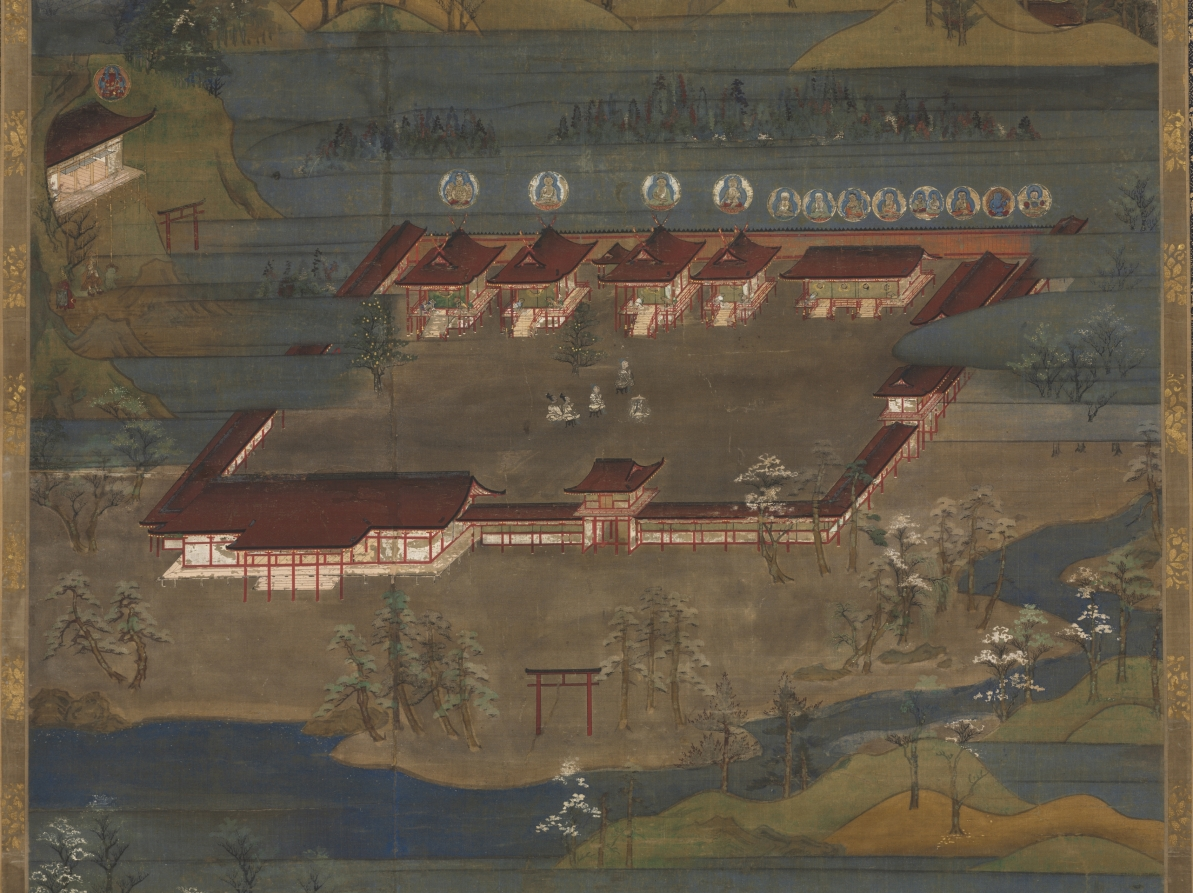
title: Mandala of the Three Shrines at Kumano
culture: Japan, Kamakura period (1185–1333) to Nanbokuchō period (1336–92)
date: 1300s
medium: hanging scroll; ink and color on silk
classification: Painting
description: This painting depicts the three shrines of Kumano from a bird’s-eye perspective, with the Buddhist counterparts of the kami of each shrine hall shown in discs directly above the halls. It also features figures, both pilgrims and deities, along the pilgrimage route and at the shrines. It is the only surviving work illustrating architectural representations of all three shrines in the same painting. They are compressed into a stacked composition, with the Nachi shrine at the top, the Shingū in the middle, and the Hongū at the bottom.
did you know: The sacred waterfall at the top right of the painting is called Nachi.